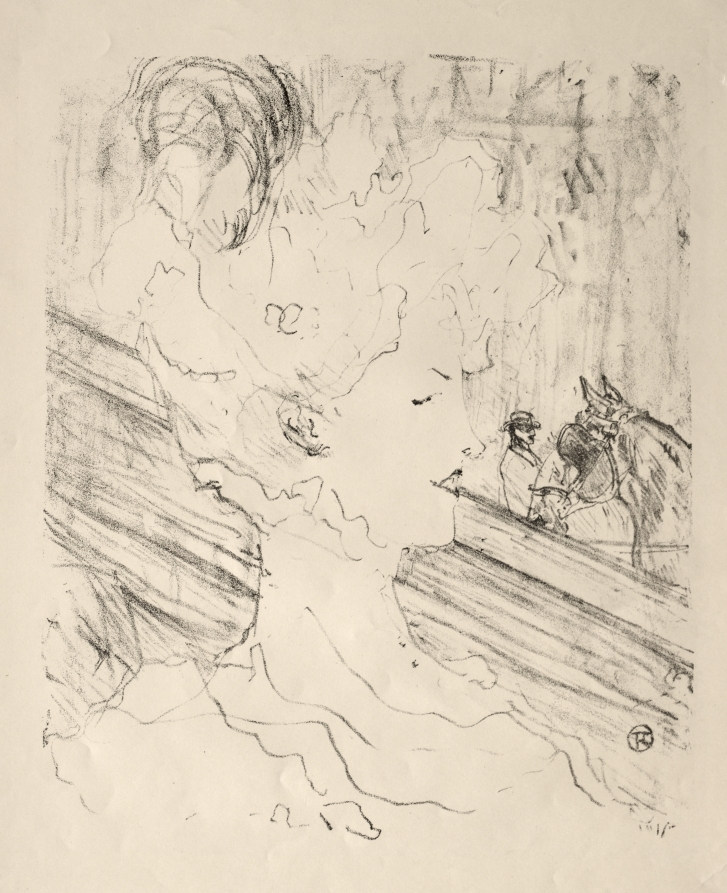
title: Emilienne d'Alençon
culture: France, 19th century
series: Thirteen Lithographs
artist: Henri de Toulouse-Lautrec (French, 1864–1901)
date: 1898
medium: lithograph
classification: Print